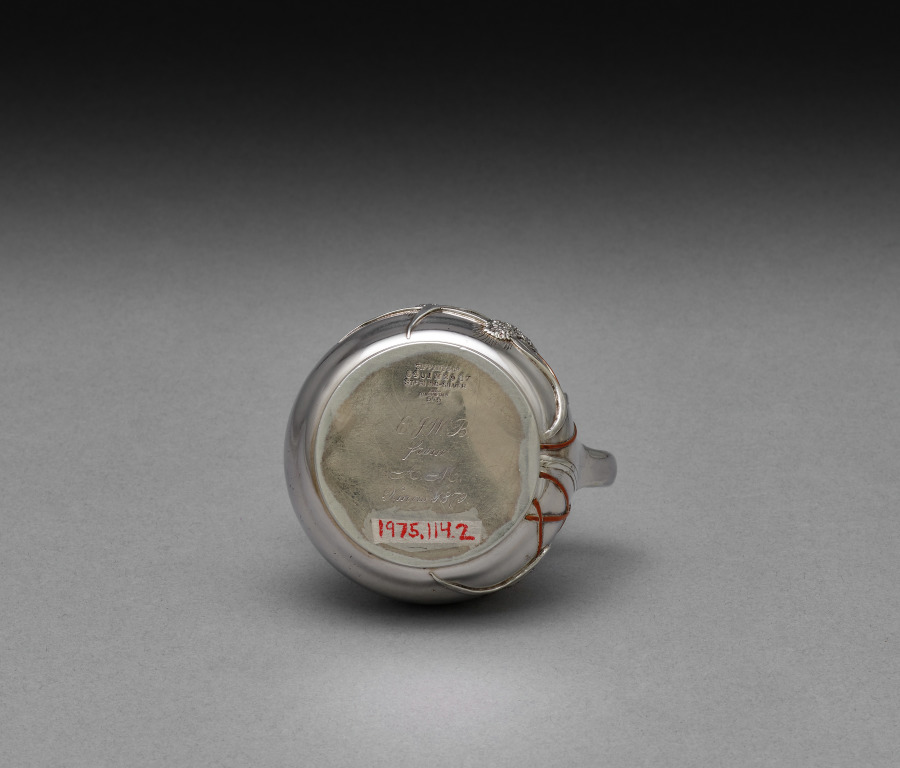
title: Cream Pitcher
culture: America, New York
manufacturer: Tiffany & Co. (America, New York, est. 1837)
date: c. 1879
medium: silver inlaid with copper and gold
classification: Silver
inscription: engraved: E.J.W.B./from/A.M./Xmas 1879. (The A.M. may refer to Alfred Morrison, a wealthy man who supported contemporary decorative arts by collecting them for his London house.)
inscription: Stamped underside: "Tiffany + Co.\ 5401 M 2987\ Sterling-Silver\ and-\other-\ metals\909".